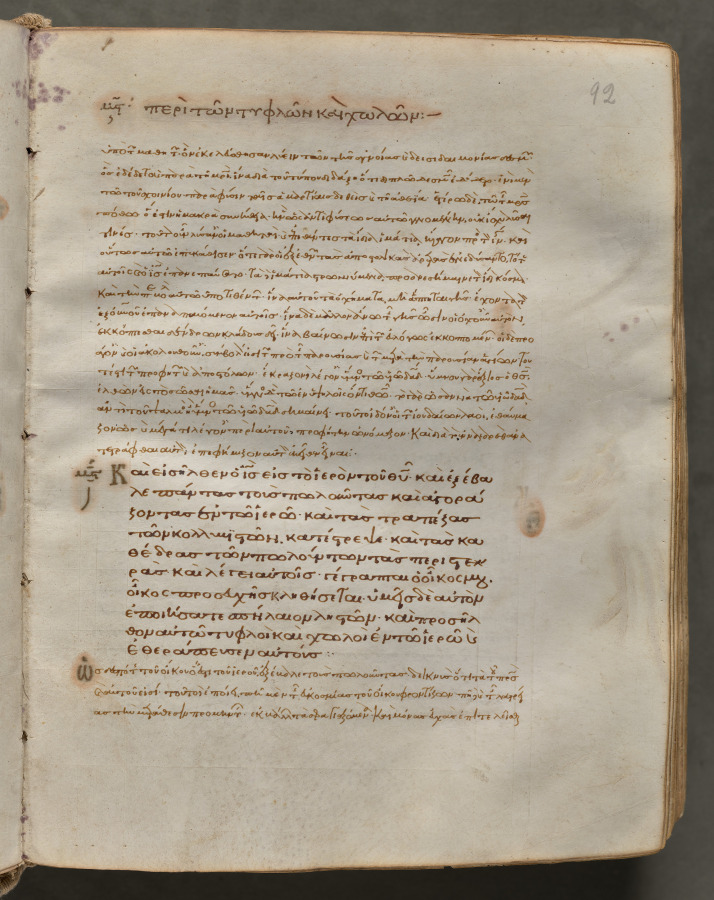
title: Text, folio 92 (recto), from a Gospel Book with Commentaries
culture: Byzantium, Constantinople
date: c. 1000–1100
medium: ink, tempera, and gold on vellum; leather binding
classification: Bound Volume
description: Each of the four gospels in this book opens on a page with brilliantly illuminated borders depicting the author of the text as well as birds-principally peacocks, symbols of the immortality of the soul-and fountains, representing the fountain of life and the salvation of the soul. This volume consists of 428 leaves with texts in Greek. Its level of sophistication suggests that it was probably written and decorated in a monastery in Constantinople.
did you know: Gospel Books were carried in procession through Byzantine churches.